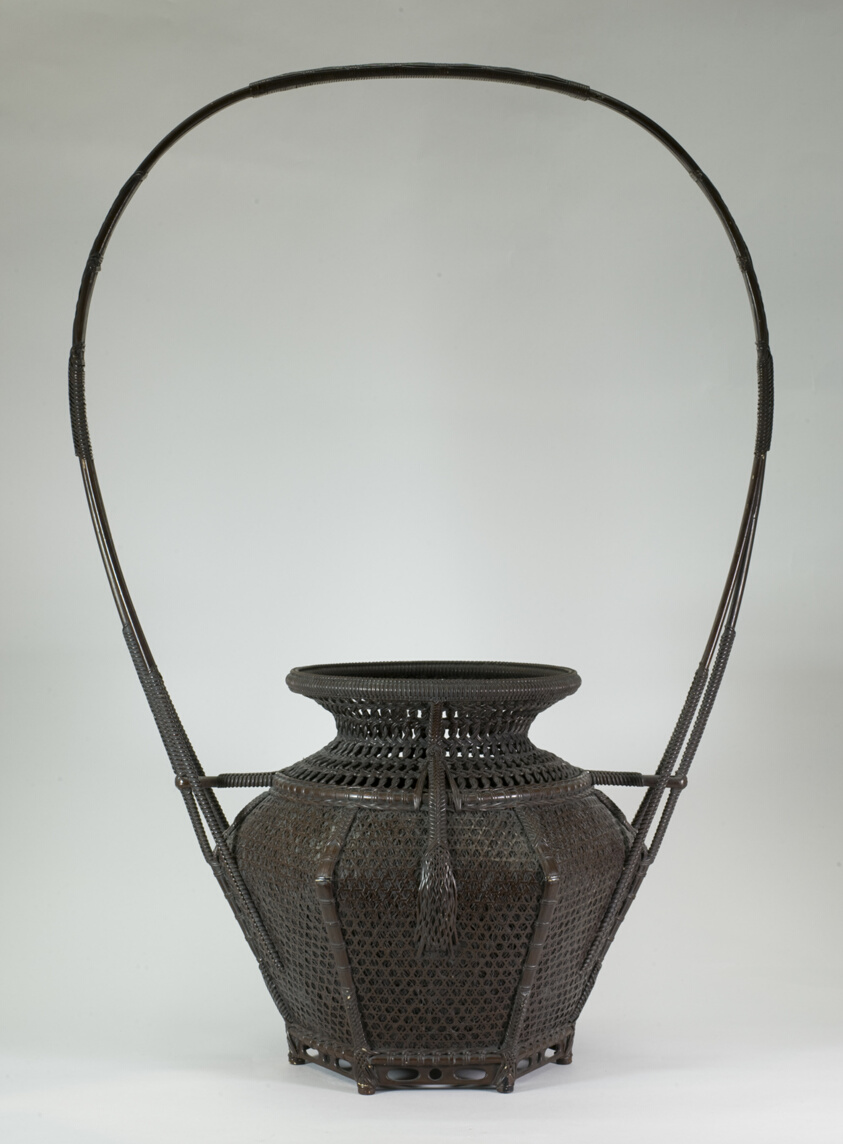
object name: Decorative Arts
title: Peony Basket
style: Japanese (culture or style)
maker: Wada Rinshi (Japanese, active late 18th or early 19th century)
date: c.1800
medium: Bamboo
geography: Japan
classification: basketry; decorative arts